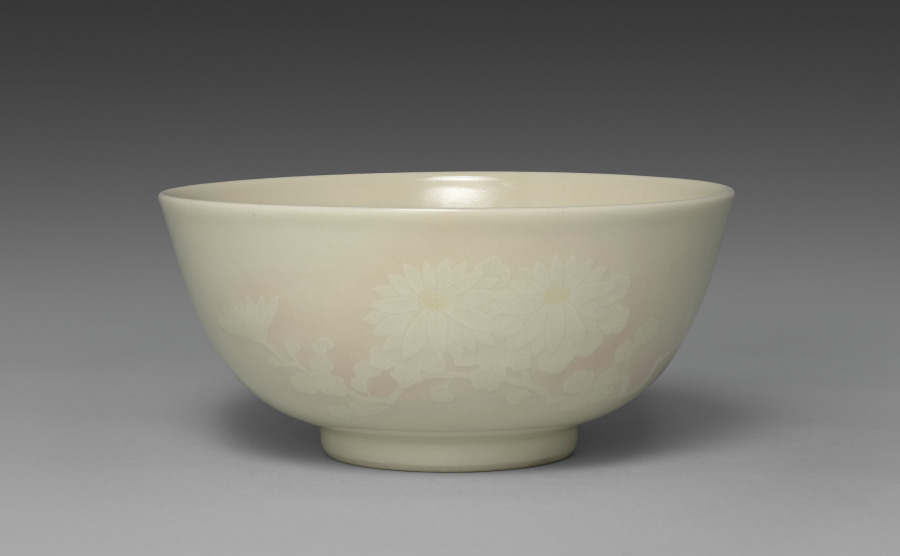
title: Sweets Bowl with Chrysanthemums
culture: Japan, Taishō period (1912–26) or Shōwa period (1926–89)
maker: Seifū Yohei IV (Japanese, 1872–1951)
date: 1914–46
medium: Porcelain with in-glaze and underglaze color and molded design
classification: Ceramic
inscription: 清風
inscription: 成山清風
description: Sweets bowls hold the confections enjoyed when drinking tea. This bowl and CMA 2022.207 offer an important lesson in appreciating Yohei IV’s ceramic practice, for while they have the same design and shape and are made with the same materials, the execution of the pieces makes them entirely different upon close inspection, thereby demonstrating the range of possible production results from a single template. Each bowl has the same composition of two different types of chrysanthemum flowers, one with long, slim, knifelike petals and the other with short, rounded, multilayered petals, shown running around its surface in low relief. The centers of the flowers are painted with yellow under the glaze. Yohei III formulated a number of new underglaze colors during his career, and this is likely one of them. The storage box lid provides abbreviated descriptions of the complex processes used in the surface decorations. It identifies the bowl inside as “Sweets dish with picture of chrysanthemum in kanpakuyū.” The box lid has on its exterior the seal reading “Seizan Seifu” 成山清風, which includes Yohei IV’s style name, but no signature. Instead, a signature is found on the interior of the box lid, accompanied by another seal, this time a gourd-shaped seal reading “Seifu.” The ink inscriptions are in a mode closer to formal script. This bowl, with the signature on the inside of the box lid, stands out for a distinctively bubble-filled glaze with a heavier pink effect, as well as more noticeable yellow at the flowers’ centers and deeper carving in the relief decoration. The design has crept much closer to the rim. A closer look at the delineation of the flower petals reveals that the designs differ at times with respect to which petals appear in front or behind others. The centers of the bases of both bowls are incised with “Seifu” in a manner matching many other works by Yohei IV, although there are slight differences. As one might expect from the other differences in the bowls, the characters on the base of the subtle bowl, CMA 2022.207, are gentler, finishing in a tapering out of the strokes. The strokes on this bold bowl end in triangular pinheads.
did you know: Here Yohei IV used his father’s kanpakuji formula, with underglaze pink for the gradated wash of color surrounding the flowers.